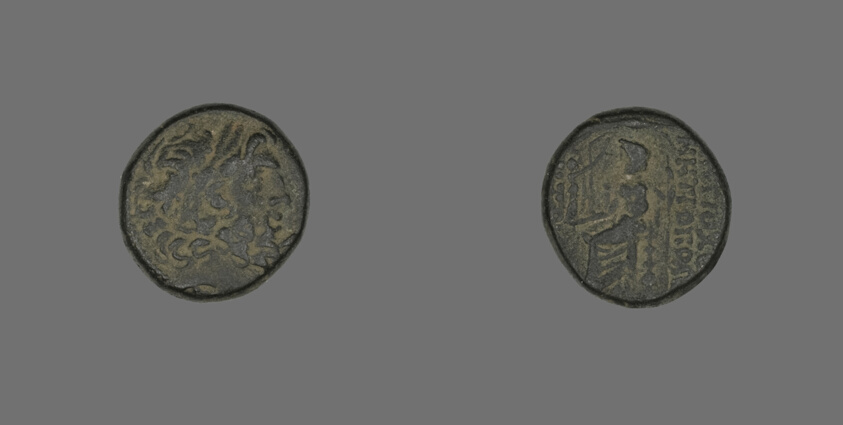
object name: Coin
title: Coin Depicting the God Zeus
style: greek, ancient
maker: Greek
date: 1st century BCE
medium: Bronze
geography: Greece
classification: coin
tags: gods (deities), zeus